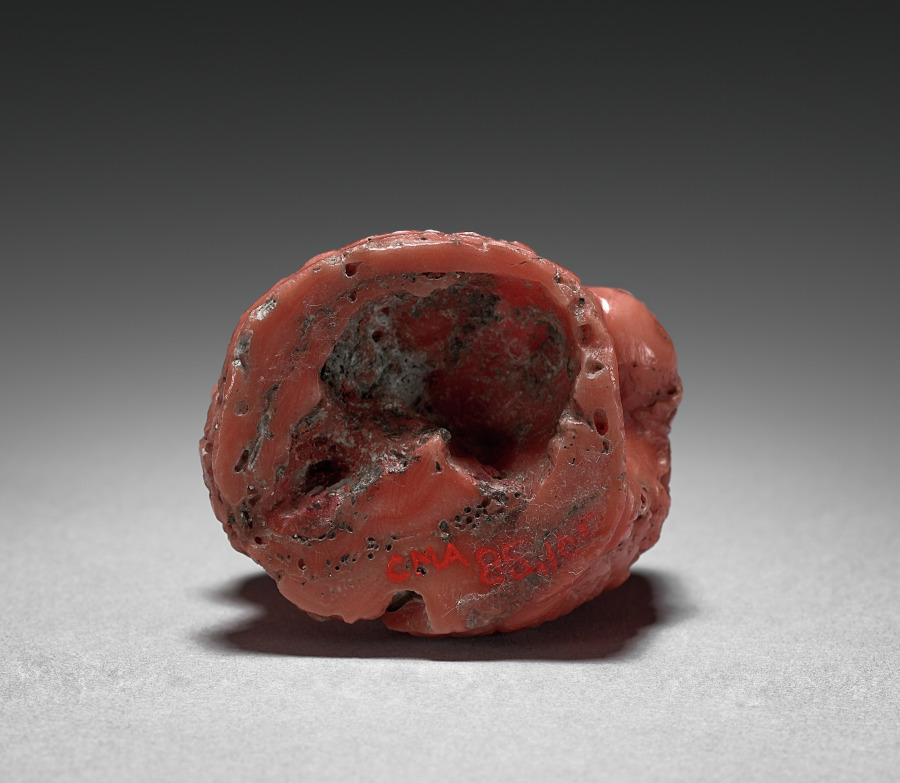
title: Sword Hilt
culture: Pakistan, Gandhara, Kushan period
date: c. 100s–200s CE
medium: coral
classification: Sculpture